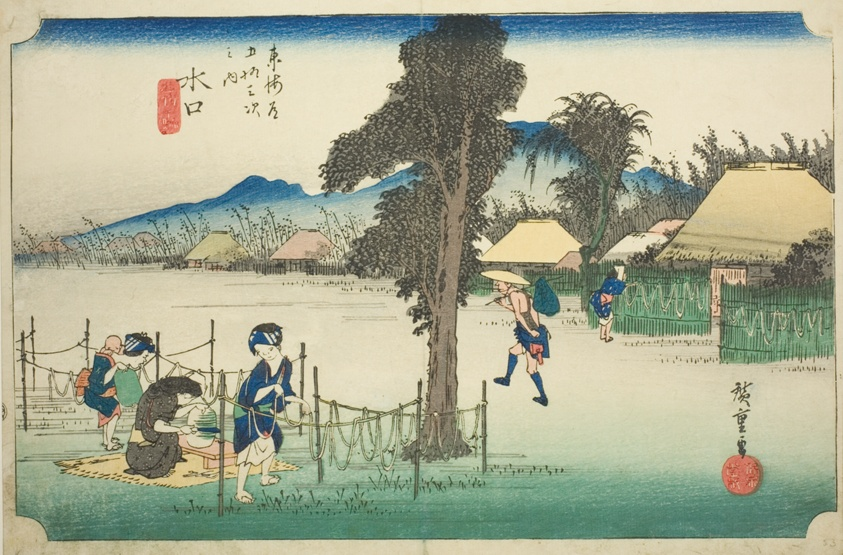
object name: Print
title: Minakuchi: Dried Gourd Shavings, A Local Specialty (Minakuchi, meibutsu kanpyo), from the series "Fifty-three Stations of the Tokaido (Tokaido gojusan tsugi no uchi)," also known as the Hoeido Tokaido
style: Japanese (culture or style)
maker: Utagawa Hiroshige 歌川 広重; Japanese, 1797-1858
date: c. 1833/34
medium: Color woodblock print; oban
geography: Japan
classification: woodblock print; print; asian art